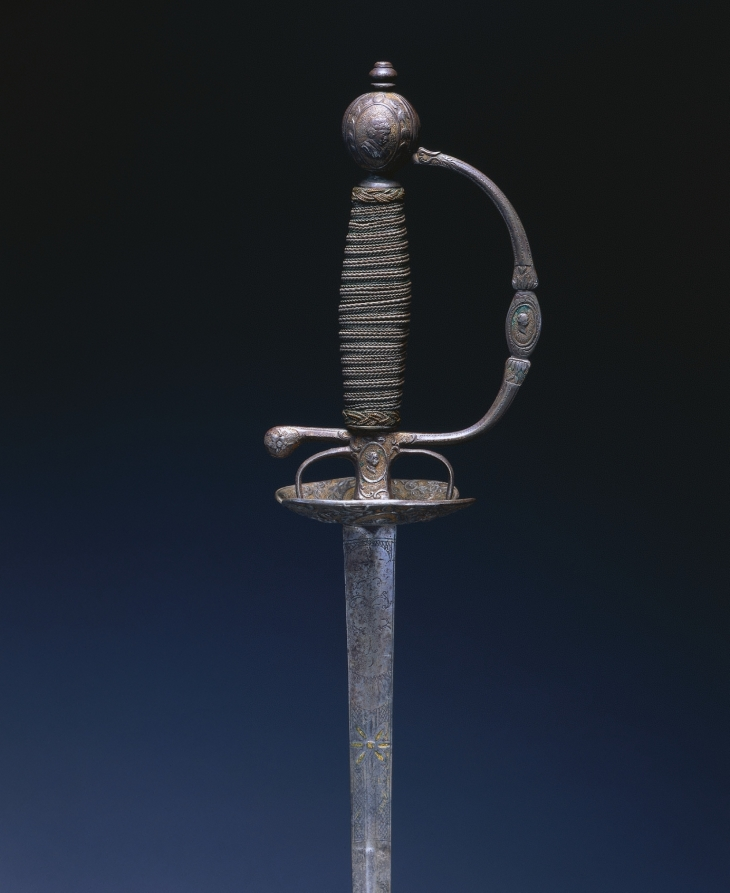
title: Small Sword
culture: France, Paris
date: c. 1750–1770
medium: steel, gilded with wood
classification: Arms and Armor